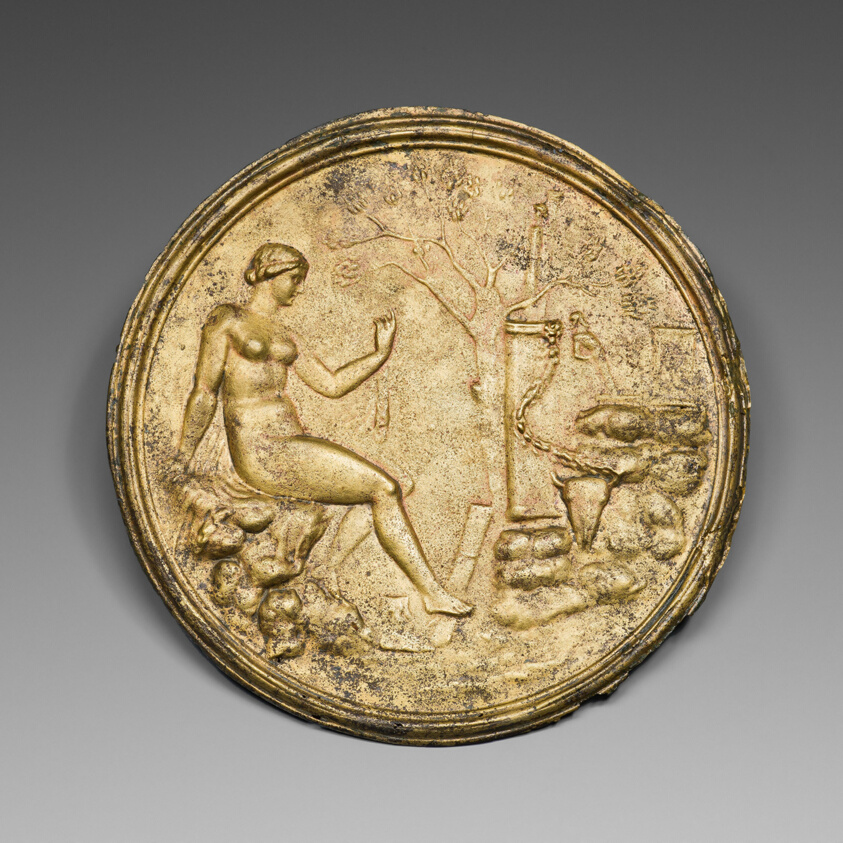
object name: Decorative Arts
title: Mirror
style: imperial (roman), ancient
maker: Roman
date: 2nd century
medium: Reflective disk: bronze; repoussé disk: brass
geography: Roman Empire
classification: mirror; bronze; metalwork; ancient art; decorative arts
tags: mythology, goddesses, gods (deities), beauty, rituals